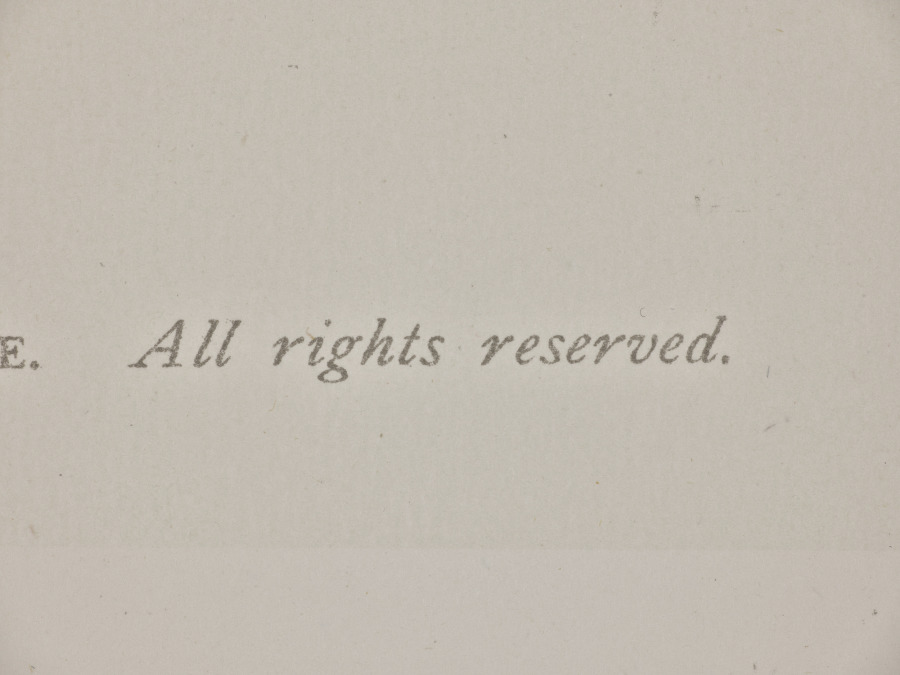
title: Emptying a Bucket of Water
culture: America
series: Animal Locomotion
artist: Eadweard J. Muybridge (American, 1830–1904)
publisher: University of Pennsylvania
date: 1887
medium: collotype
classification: Photograph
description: Eadweard J. Muybridge initially used horses to capture motion as separate slices of time faster than the human eye could perceive them, then moved on to study other animal and human movements. Everyday activities, like emptying a bucket of water, were broken down and sequenced back-to-back. This series was commissioned by the University of Pennsylvania and intended to diagnose dysfunction in human movement by allowing each consecutive action to be studied in isolation. The university’s desire for distribution called for the use of collotype. The process had been recently improved to the point where editions of up to 1,000 were possible, making it an attractive option for publishers.